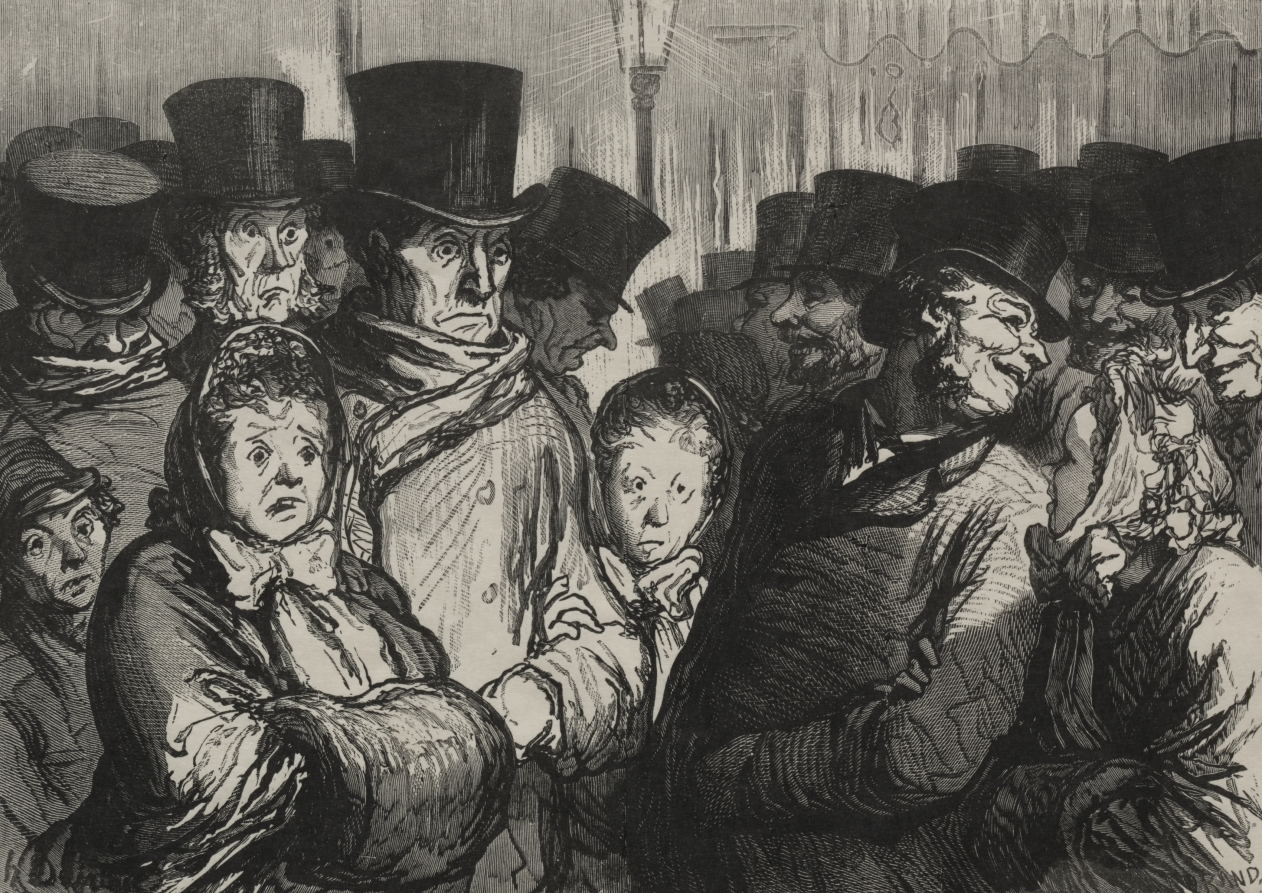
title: A Street at Midnight: Coming out of a drama. Coming out of a variety show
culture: France, 19th century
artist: Honoré Daumier (French, 1808–1879)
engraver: Charles Maurand (French, 1824–1904)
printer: François Louis Schmied (Swiss, 1873–1941)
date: 1863, printed 1920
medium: wood engraving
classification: Print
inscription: Lower margin, in pencil: 65/75 ; red stamp: FLS